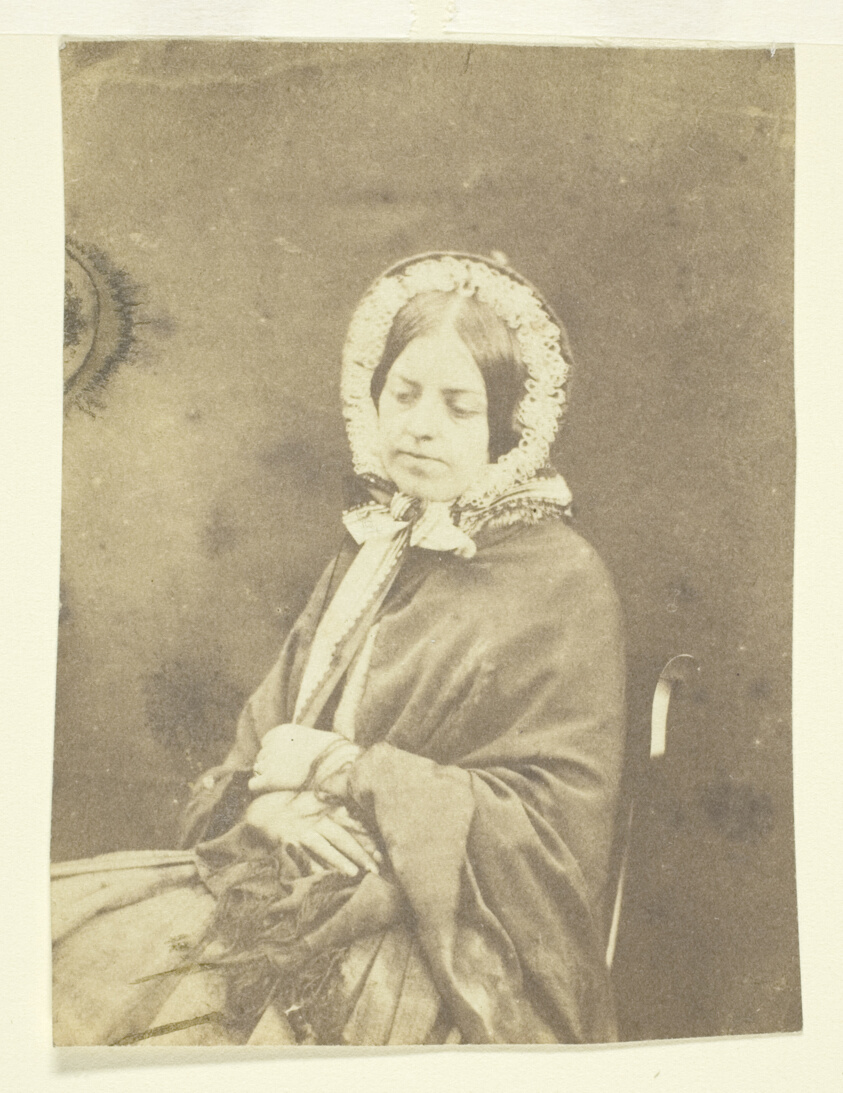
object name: Photograph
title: Mrs. Craik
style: 19th century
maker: Artist unknown, possibly Benjamin Mulock (English, 1829–1863); English, 19th century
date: 1850/59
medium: Calotype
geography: England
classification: salted paper print; photographic process; photography; photograph